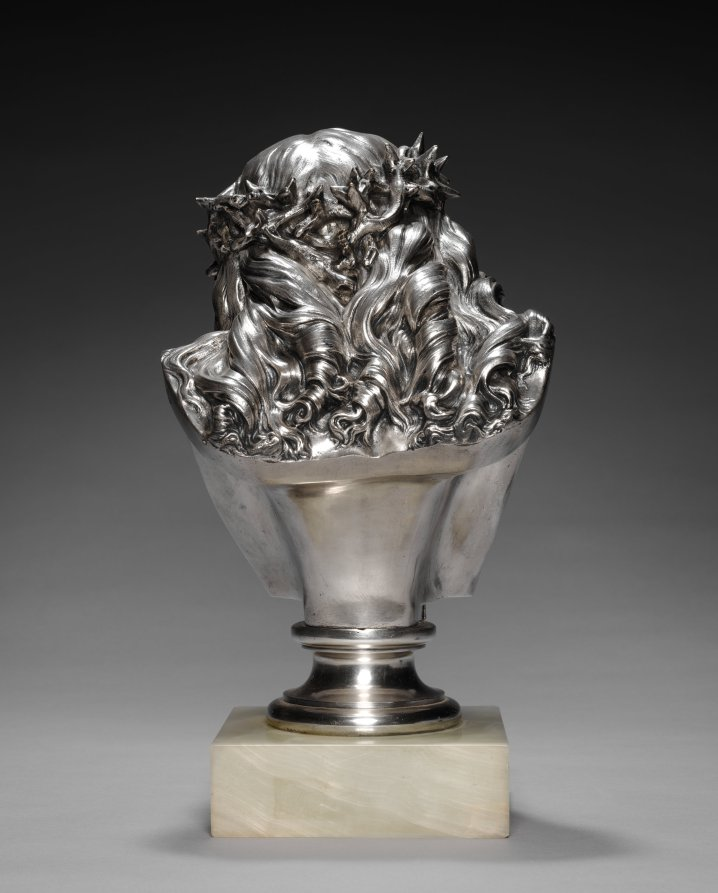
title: Head of Christ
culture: France, 19th century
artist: Jean-Baptiste Clésinger (French, 1814–1883)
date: 1867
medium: silvered bronze, marble base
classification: Sculpture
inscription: Signed in cut of right proper shoulder: "J. Clesinger, 1867"; inscribed in cut of left proper shoulder: "POUSSIELGUE RUSAND PARIS"; struck immediately above circular base: "17662"